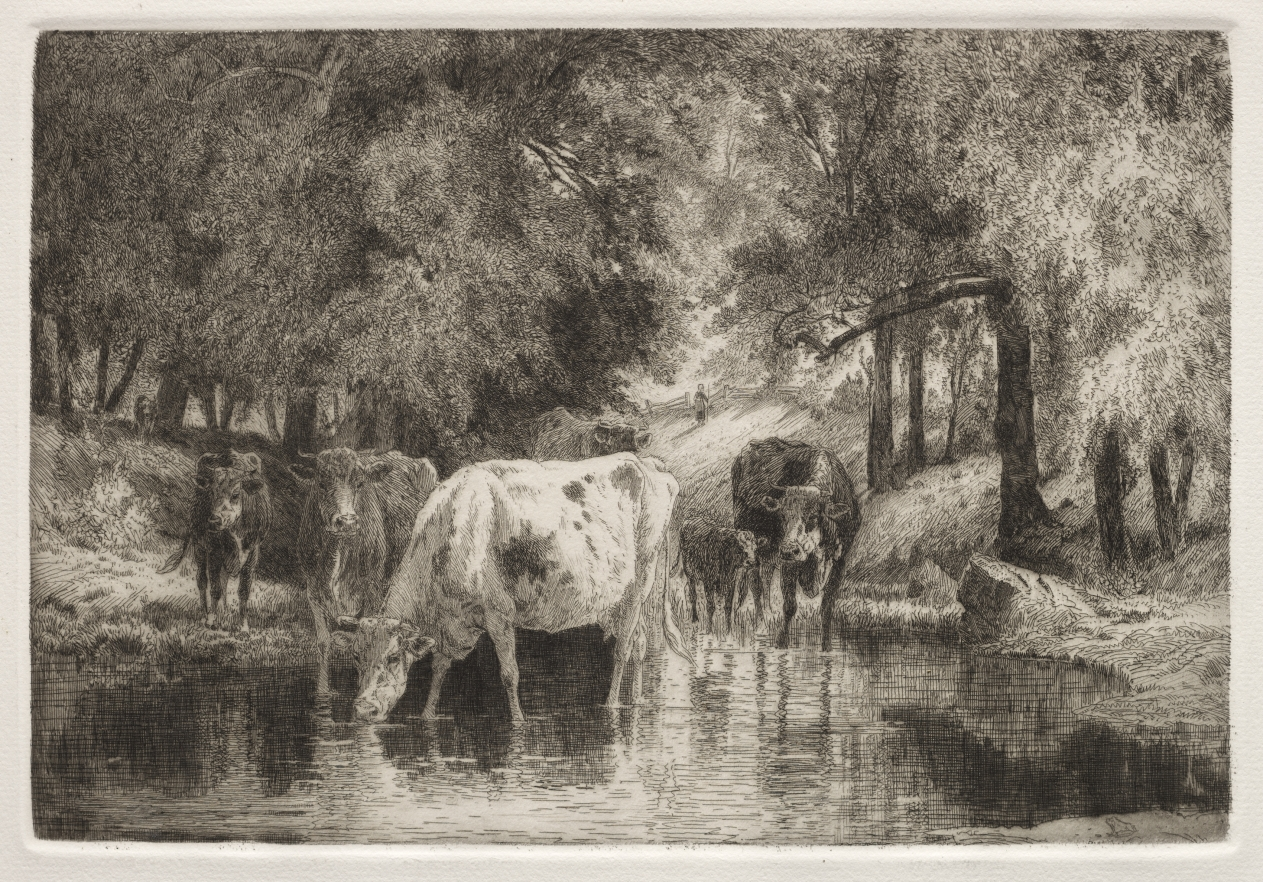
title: The Pool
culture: America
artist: Peter Moran (American, 1841–1914)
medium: etching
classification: Print